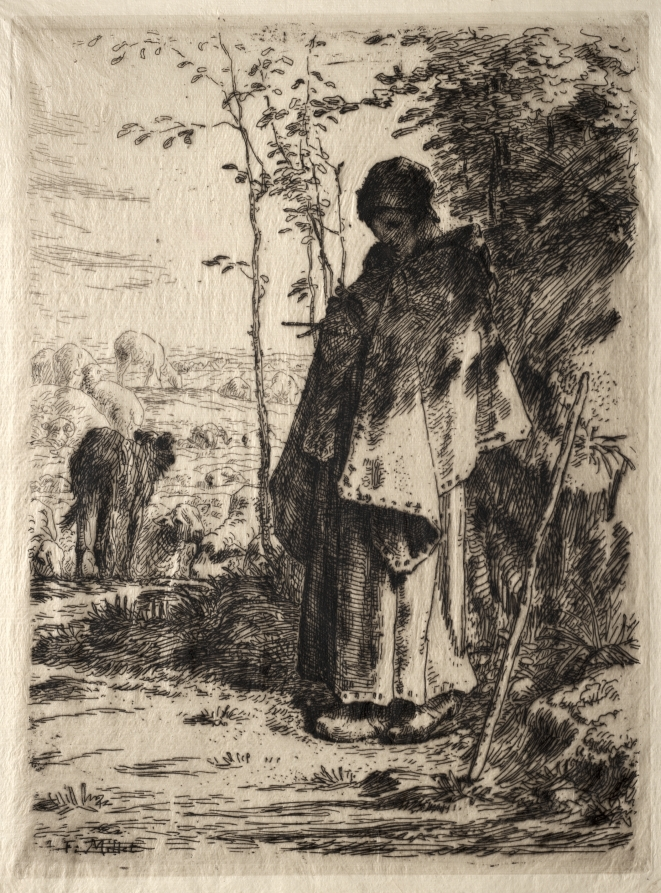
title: The Large Shepherdess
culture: France, 19th century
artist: Jean-François Millet (French, 1814–1875)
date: 1862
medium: etching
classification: Print